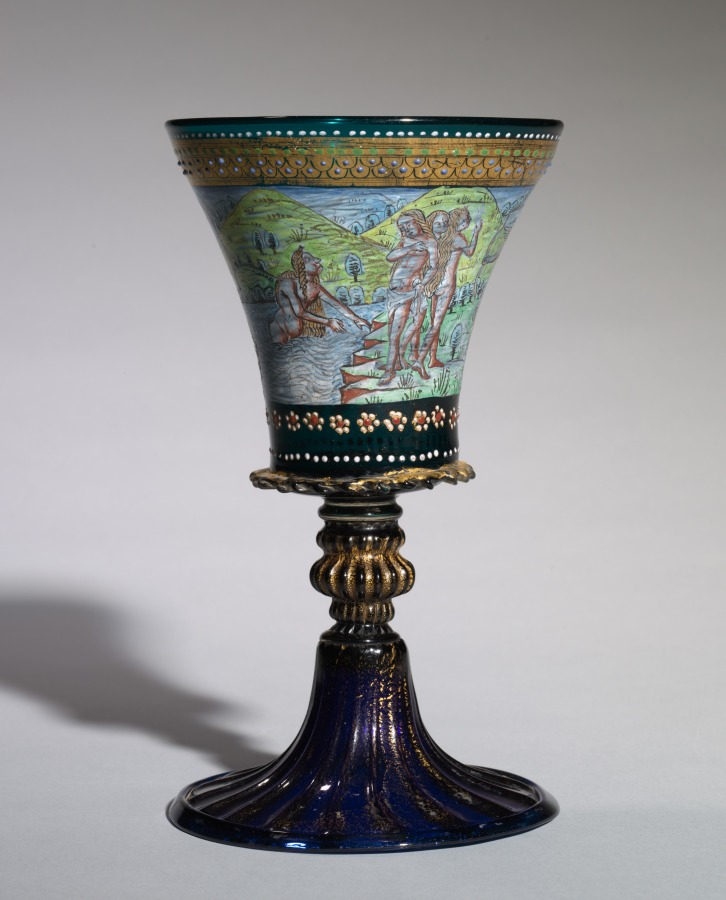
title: The Peddler Goblet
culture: Italy, Venice (Murano), 19th century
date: 1800s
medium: green and blue glass, enameled and gilded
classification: Glass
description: In the decoration of this goblet, the peddler, fast asleep under a tree, is robbed by monkeys. The same subject appears on the famous "Monkey Cup" in The Cloisters of The Metropolitan Museum of Art. It was obviously appealing because peddlers were traditionally believed to have many of the same vices as monkeys. Another part of the decoration includes a scene of Venus emerging from the sea, and the Three Graces.